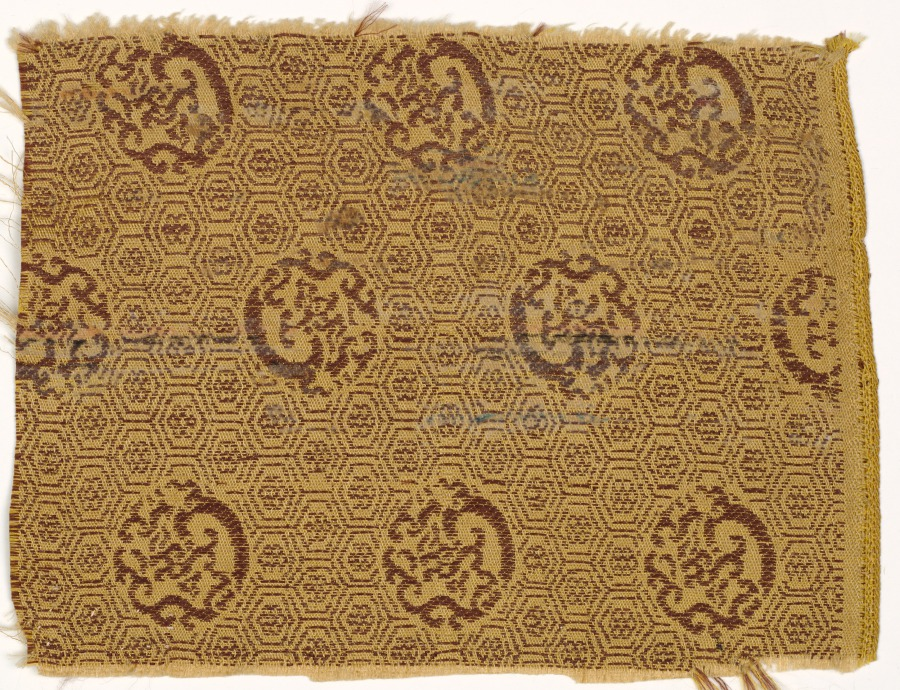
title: Fragment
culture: China, 19th century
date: 1800s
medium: silk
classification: Textile